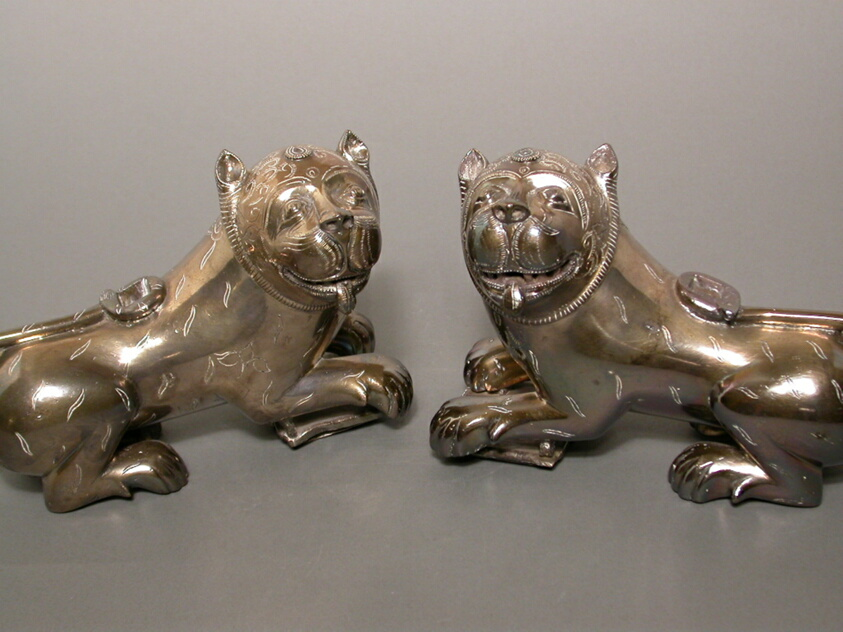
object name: Furniture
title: Lion Fittings for a Throne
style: South Asian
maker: India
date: 18th century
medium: Silver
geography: India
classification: silver; metal; vessel; asian art; furniture